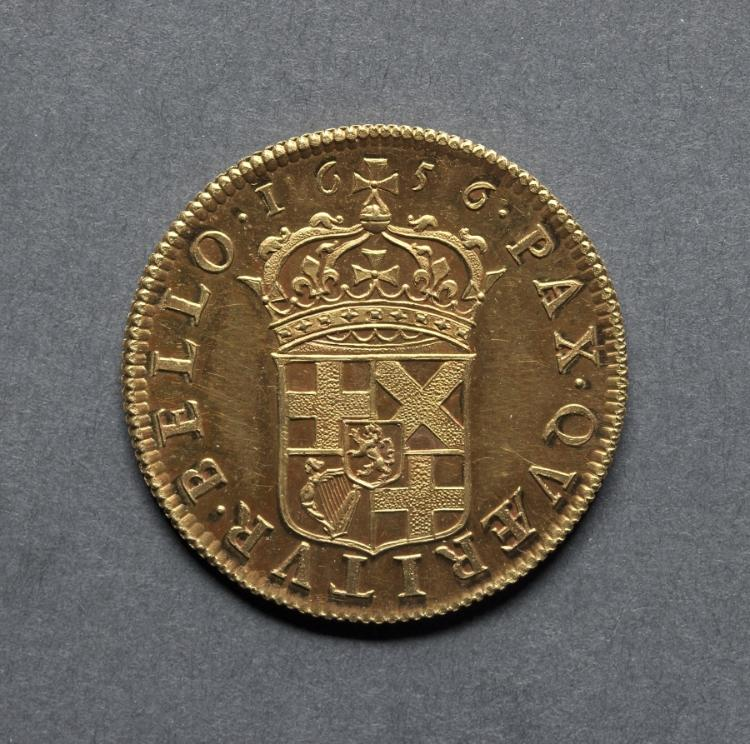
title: Broad: Crowned Shield of Arms (reverse)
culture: England, Oliver Cromwell, Lord Protector, 1653-1658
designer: Thomas Simon (British)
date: 1656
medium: gold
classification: Coins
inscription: PAX · QVÆRITVR · BELLO ·